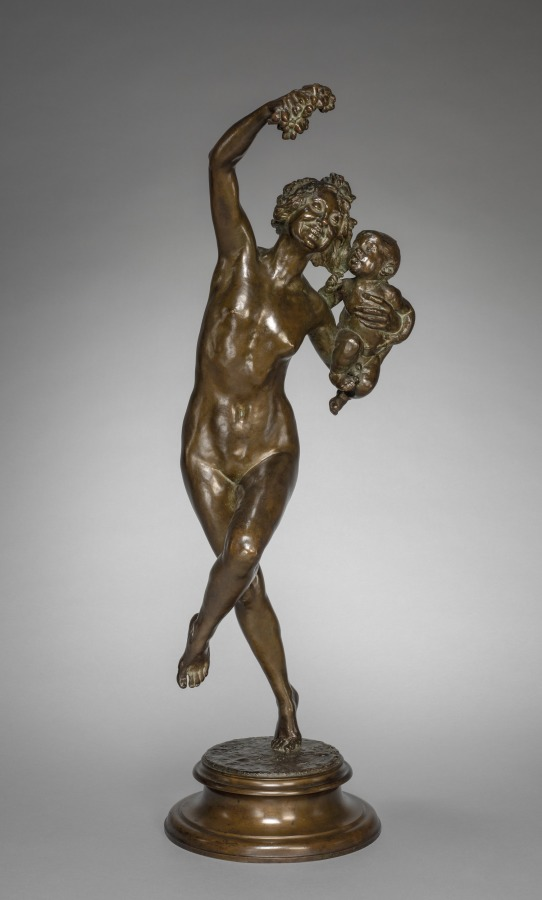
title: Bacchante and Infant Faun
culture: America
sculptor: Frederick William MacMonnies (American, 1863–1937)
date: 1894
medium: bronze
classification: Sculpture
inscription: Signed on base: F. Macmonnies, 1894.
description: This sculpture is a smaller version of a three-quarter life-size bronze given by the artist to Charles McKim, the architect for the Boston Public Library who placed the statue in the fountain of the library's courtyard. Although the vast majority of Bostonians supported the statue, a small but powerful group denounced it as "debauched," "vice-ridden," and "treason to purity and sobriety and virtue, and Almighty God." The opponents included the Boston Brahmins—a group of Anglo-Saxon, Protestant elite—and various religious, temperance, and antivice organizations. Feeling threatened by the swell of immigrants and by the changing roles of women, these groups hoped that the library would offer an alternative to the saloons frequented by Boston's lower classes. But a statue of a nude woman reveling under the effects of wine from the Roman god Bacchus only devalued this bastion of civilization. Consequently, the Boston Art Commission rejected the statue in 1897. However, in 1992 Boston's Art and Humanities commissioner and the library trustees returned a version of the original to the courtyard without public protest.